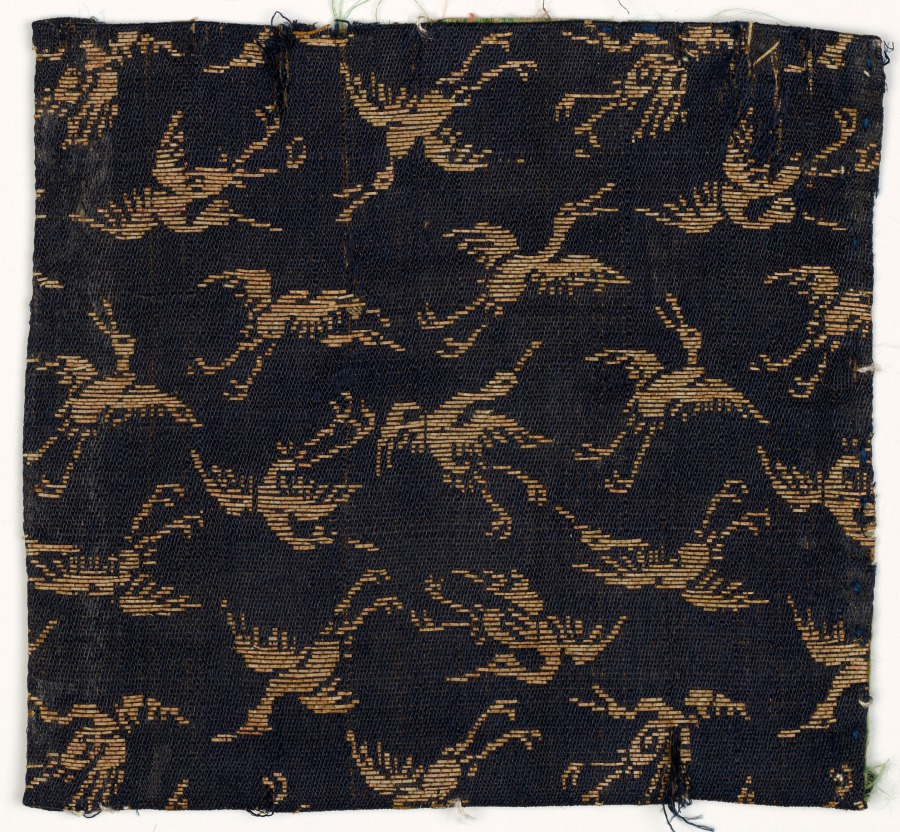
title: Textile Fragment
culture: Japan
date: 1800s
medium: silk, metallic thread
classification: Textile